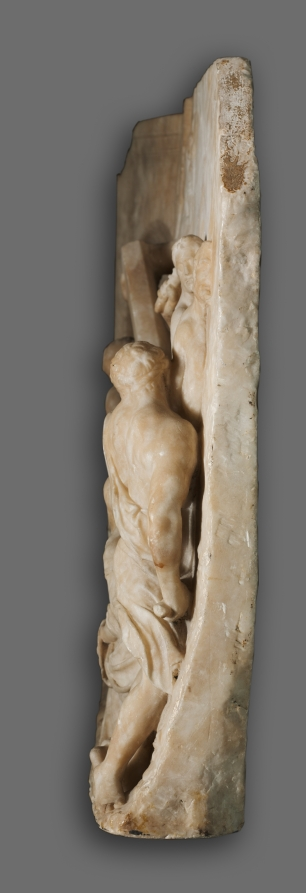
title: Christ Carrying the Cross with Saints Simon and Veronica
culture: South Netherlands, Hainault, 16th century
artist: workshop of Jacques Dubroeucq (Netherlandish, 1500/10–1584)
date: c. 1545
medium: alabaster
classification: Sculpture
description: As Christ dragged his cross through the streets of Jerusalem, Veronica wiped sweat from Christ’s face, which was miraculously imprinted on the fabric. This relief probably came from a choir screen, a barrier between the altar and the congregation, common in medieval churches. Yet the sculpture is more classical than medieval. The artist, yet to be identified, clearly knew the work of Dubreoucq, an artist who brought a taste for Italian Renaissance sculpture to northern France and present-day Belgium. The use of alabaster instead of marble exploits a material local to this part of Europe.